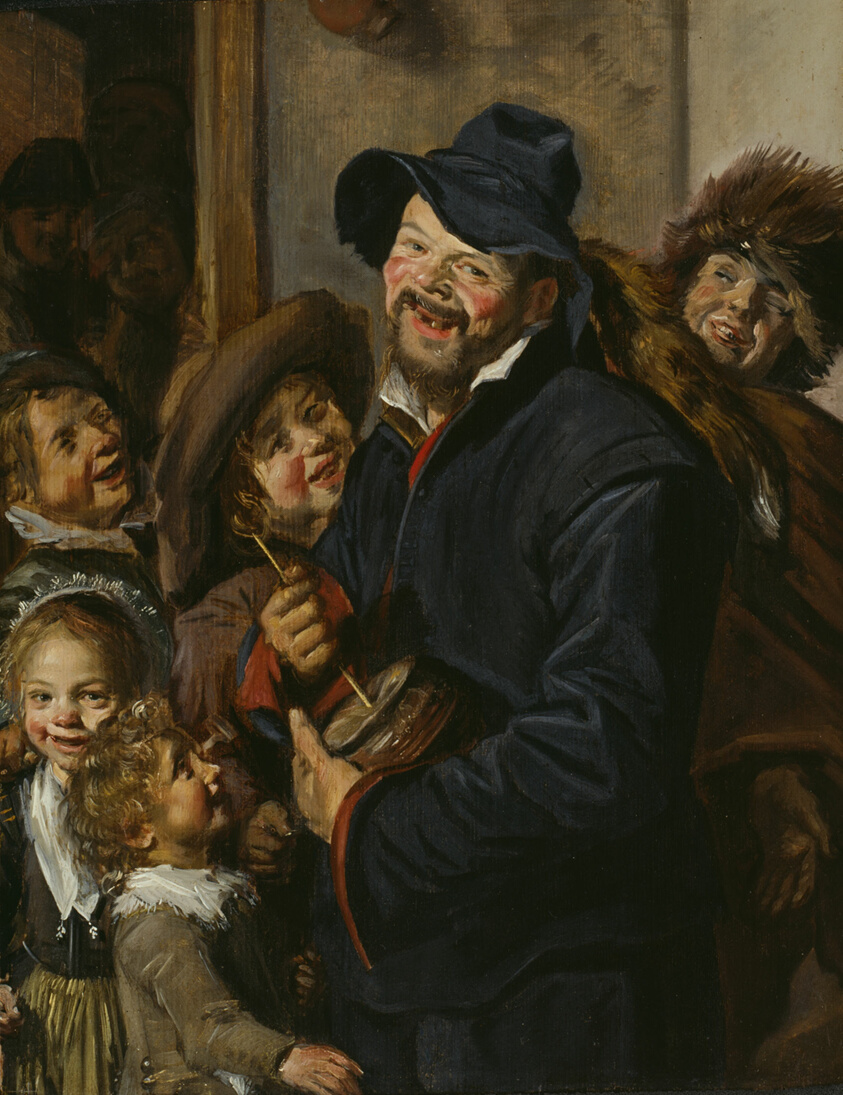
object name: Painting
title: The Rommel-Pot Player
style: 17th Century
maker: Follower of Frans Hals (Dutch, 1582–1666)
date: c. 1630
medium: Oil on panel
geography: Netherlands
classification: oil on panel; dutch; oil paintings (visual works); paint; painting; european painting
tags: musical instruments, dutch, taverns, girls, boys, man, children, music, hats